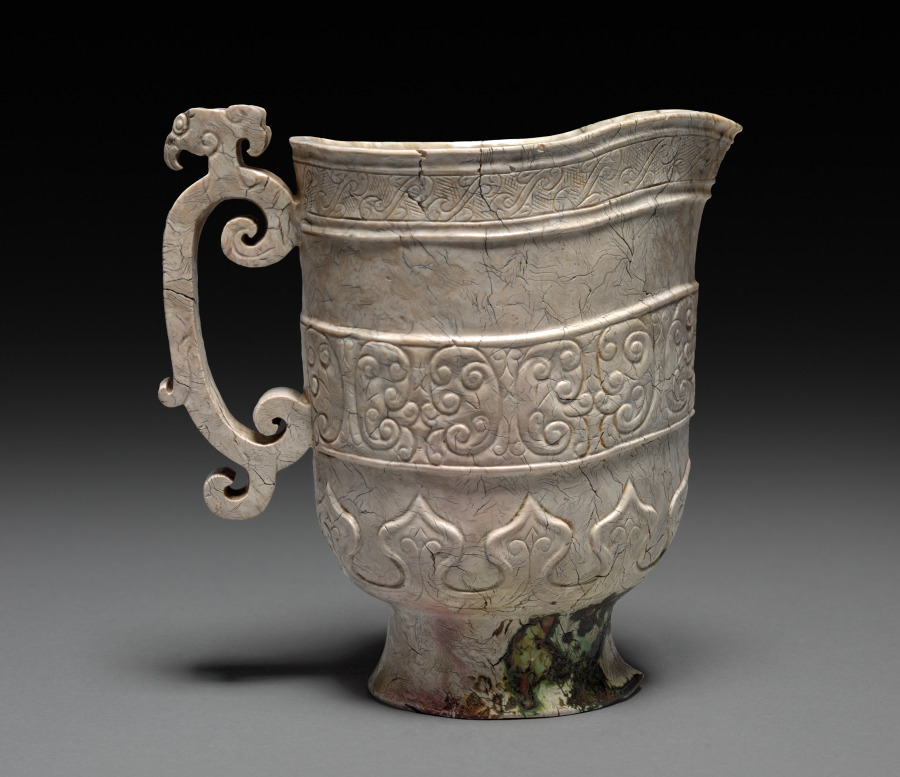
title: Ewer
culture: China, Ming dynasty (1368–1644)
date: 1700s or later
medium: jade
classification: Jade